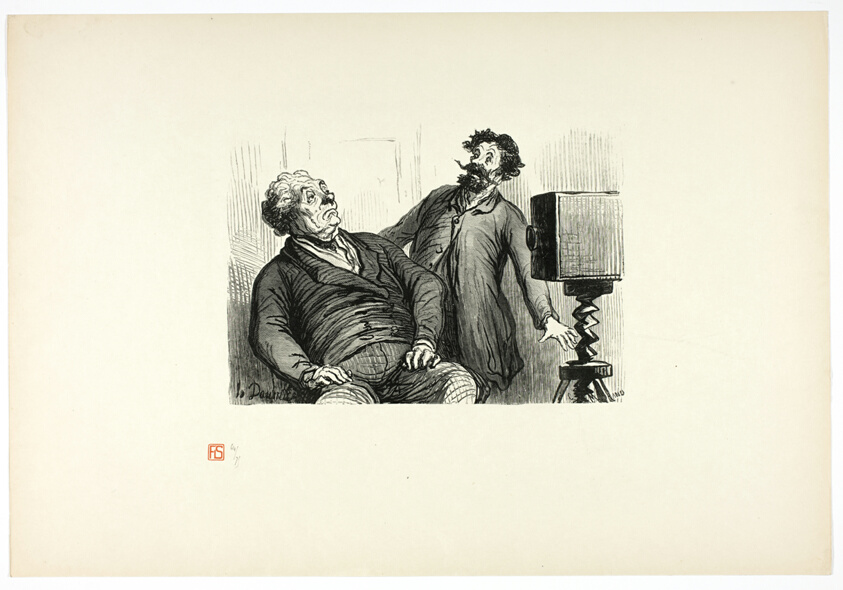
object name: Print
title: Photographes et photographiés, from Tirage Unique de Trente-Six Bois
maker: Charles Maurand (French, 1824-1904); after Honoré Victorin Daumier (French, 1808-1879); printed by François Louis Schmied (Swiss, 1873-1941); published by Jules Meynial (French, 20th century)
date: 1862, printed 1920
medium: Wood engraving on cream Japanese paper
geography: France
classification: wood engraving; print; prints and drawing